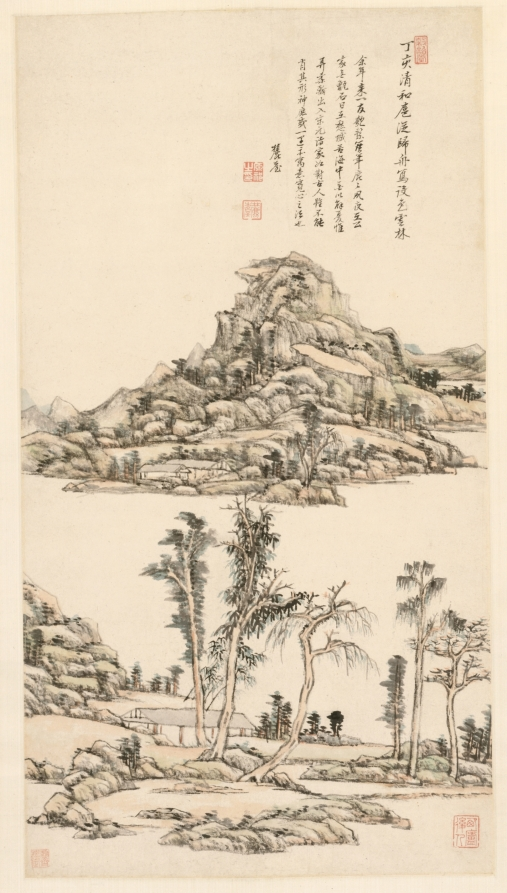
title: Landscape after Ni Zan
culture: China, Qing dynasty (1644–1911)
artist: Wang Yuanqi (Chinese, 1642–1715)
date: 1707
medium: Hanging scroll; ink and light color on paper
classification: Painting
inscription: [印]穀詒堂。 丁亥清和扈從歸舟寫設色雲林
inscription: 余年來一友匏系，簪筆鹿鹿。夙夜在公。家無甑石，日在愁城苦海中。無以解憂。惟弄柔翰出入宋元諸家，如對古人。雖不能肖其形神，庶幾一遇，亦寓意寬心之法也。麓臺。[印]原祁之印; 麓臺 [印, 右下]西廬後人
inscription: 1 additional seal of Pang Yuanji 龐元濟 (1864–1949) at the lower left corner.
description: Wang Yuanqi, an official in Emperor Kangxi’s (reigned 1662–1722) court, grew up in an artistic family. Like other mainstream painters of the Orthodox School, he followed a canon of earlier styles and artists endorsed by Ming calligrapher Dong Qichang (1555–1636). Here, Wang drew inspiration from Ni Zan (1301–1374), a Yuan dynasty painter known for his simple compositions and spare use of ink. Master Ni seldom used color, but Wang added green and ochre washes to the trees, cottages, and hills in this landscape. Painting was a way for Wang to relieve the pressures of his official duties.